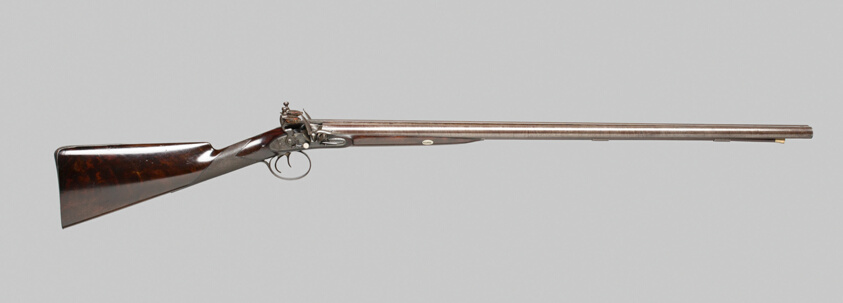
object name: Arms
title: Double-Barreled Flintlock Fowling Piece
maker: Joseph Manton (English, London, 1766-1835)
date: c. 1820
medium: Steel, iron, walnut, and platinum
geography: England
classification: firearm-long gun; arms; arms and armor